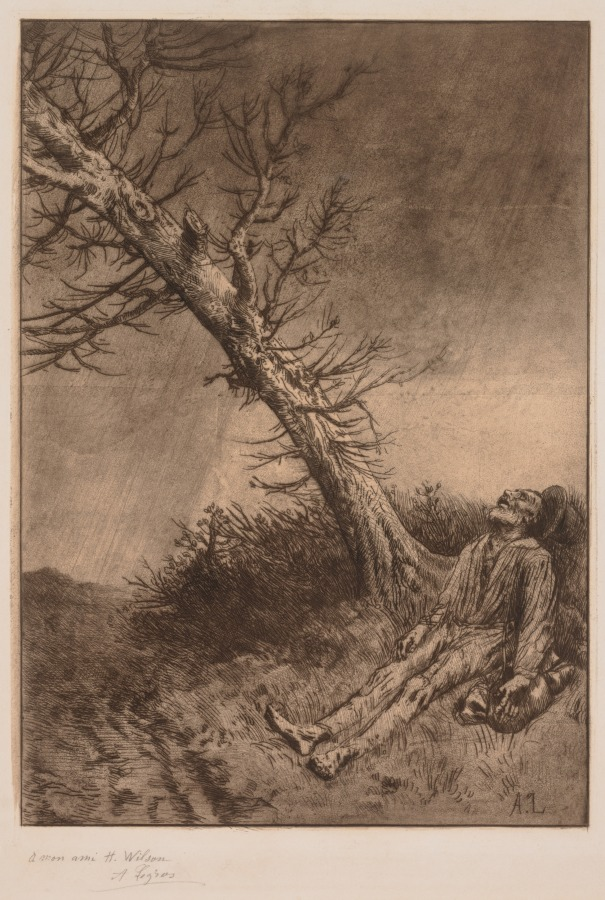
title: Death of a Vagabond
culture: France, 19th century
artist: Alphonse Legros (French, 1837–1911)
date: c. 1875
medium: etching and aquatint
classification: Print